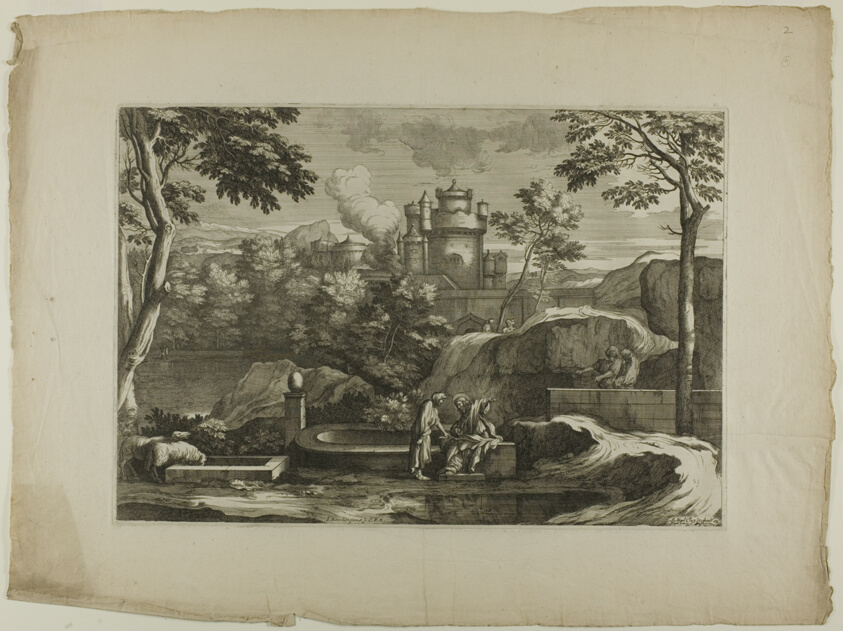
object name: Print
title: View of a City (Christ with the Good Samaritan at the Well)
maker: Sébastien Bourdon (French, 1616-1671)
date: 17th century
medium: Etching on ivory laid paper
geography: France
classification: etching; print; prints and drawing